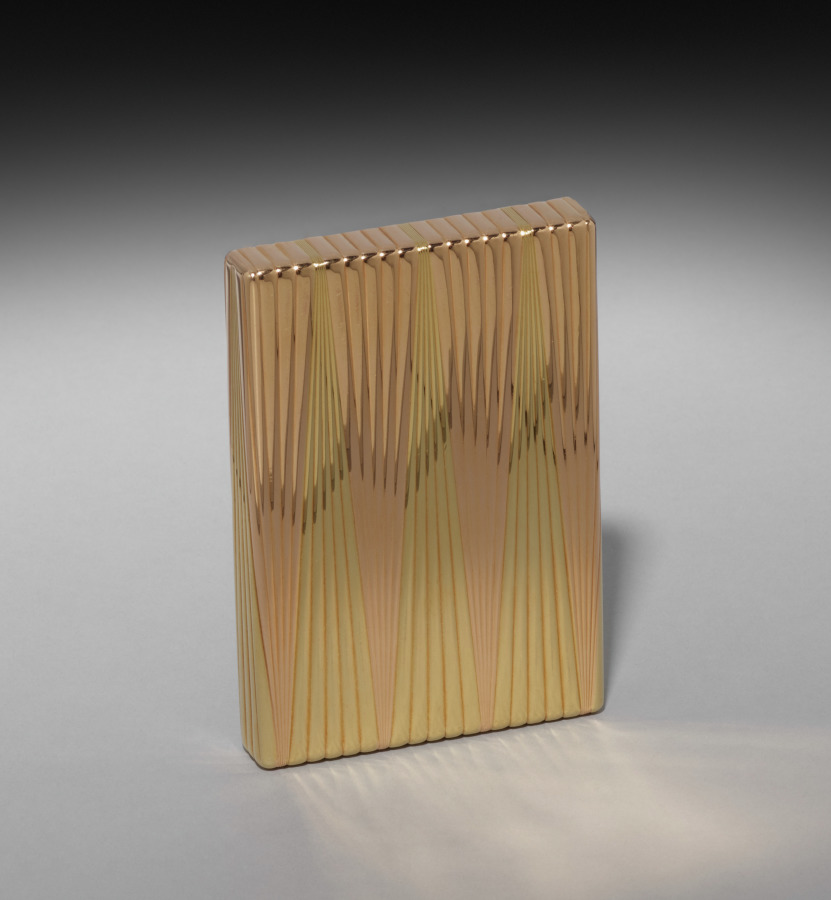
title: Cigarette Case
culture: Russia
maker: House of Fabergé (Russian, 1842–1918)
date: c. 1908–17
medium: gold, sapphire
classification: Silver